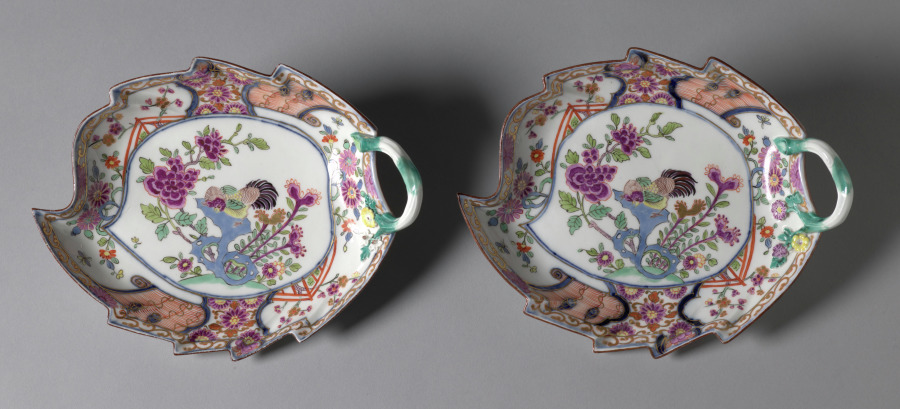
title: Leaf Dishes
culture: Germany, Meissen, 18th century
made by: Meissen Porcelain Factory (German, est. c. 1710)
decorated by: possibly by Johann David Kretschmar (German)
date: c. 1735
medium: porcelain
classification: Ceramic